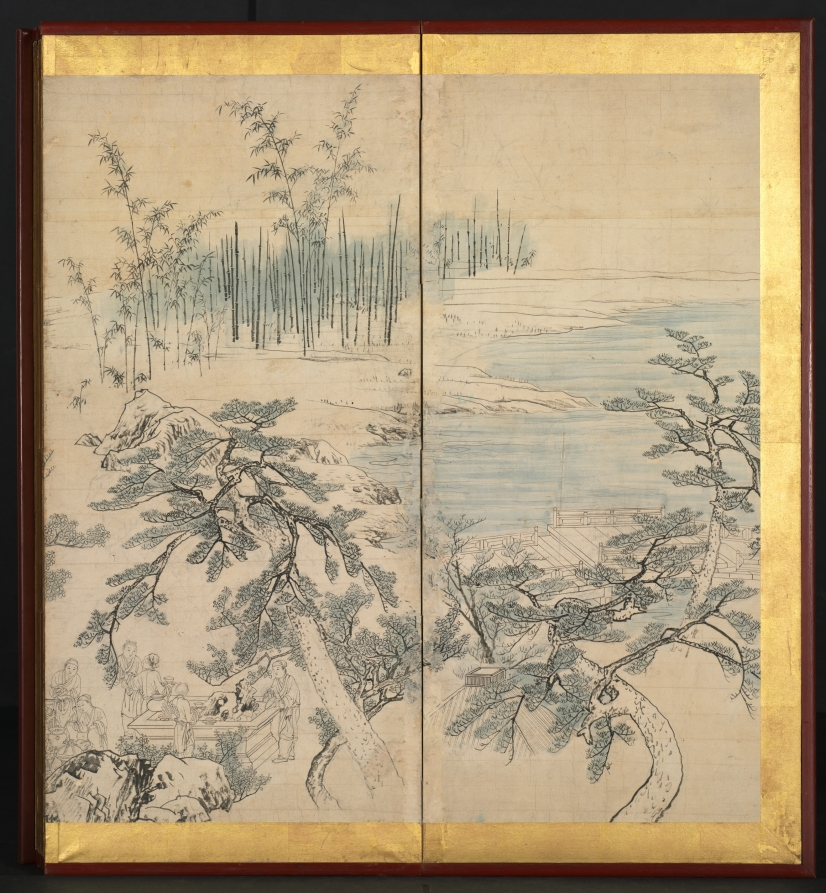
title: Literary Gathering in the Orchid Pavilion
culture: Japan, Edo period (1615–1868)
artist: Maruyama Ōkyo (Japanese, 1733–1795)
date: late 1700s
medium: Six-panel folding screen; ink and slight color on paper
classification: Painting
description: A cheerful gathering of poets was one the most popular themes of East Asian literati paintings. Literary Gathering in the Orchid Pavilion depicts a poets’ party hosted in AD 353 by the famous Chinese calligrapher Wang Xizhi to celebrate the Spring Purification Festival, observed annually on the third day of the third month. Wang invited 41 scholar-poets to compose poetry and drink while seated along the bank of a winding rivulet. This screen would have appeared on the left and shows preparations for the gathering. The lost right screen is assumed to have depicted the poets sitting along the stream.